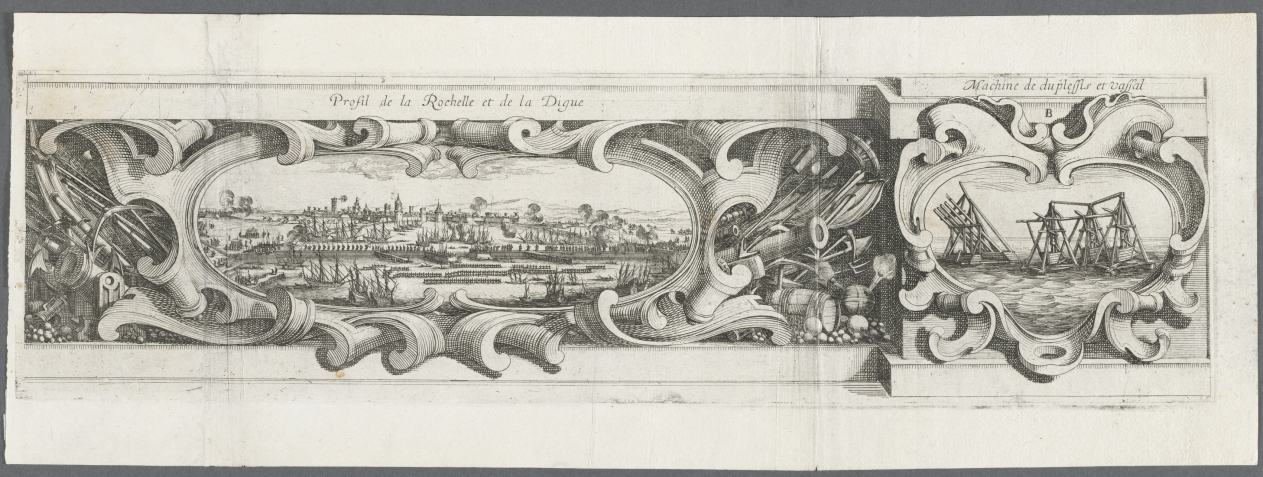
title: The Siege of La Rochelle: Plate 16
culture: France, 17th century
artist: Abraham Bosse (French, 1602–1676)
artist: or Israël Henriet (French, c. 1590–1661)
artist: after Jacques Callot (French, 1592–1635)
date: 1628–1630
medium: etching and engraving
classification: Print